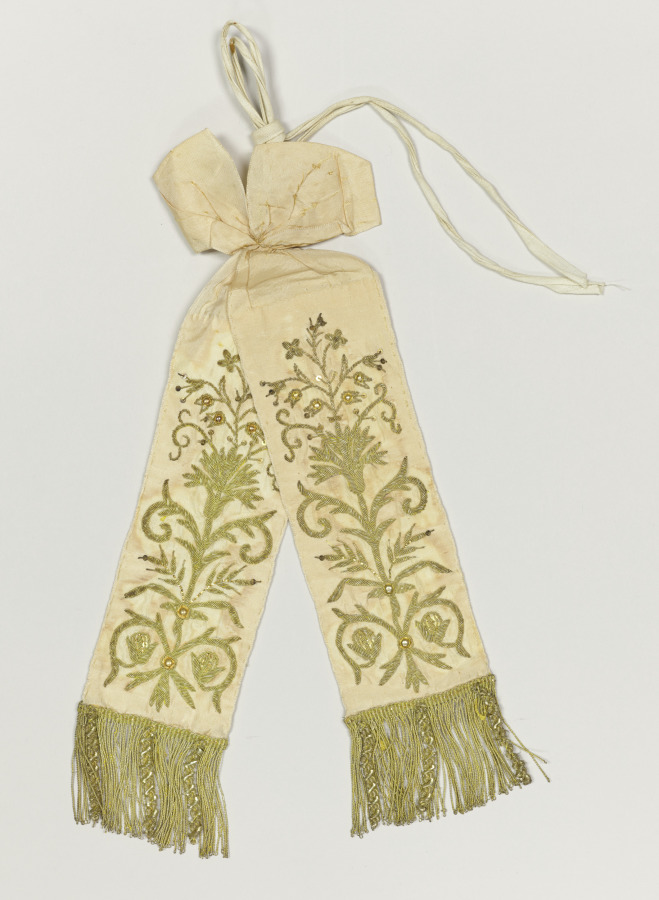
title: Woman's Costume (White Silk Band)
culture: Italy, Sicily, 19th century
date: 1800s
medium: silk (white) with metal thread embroidery and sequins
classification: Garment